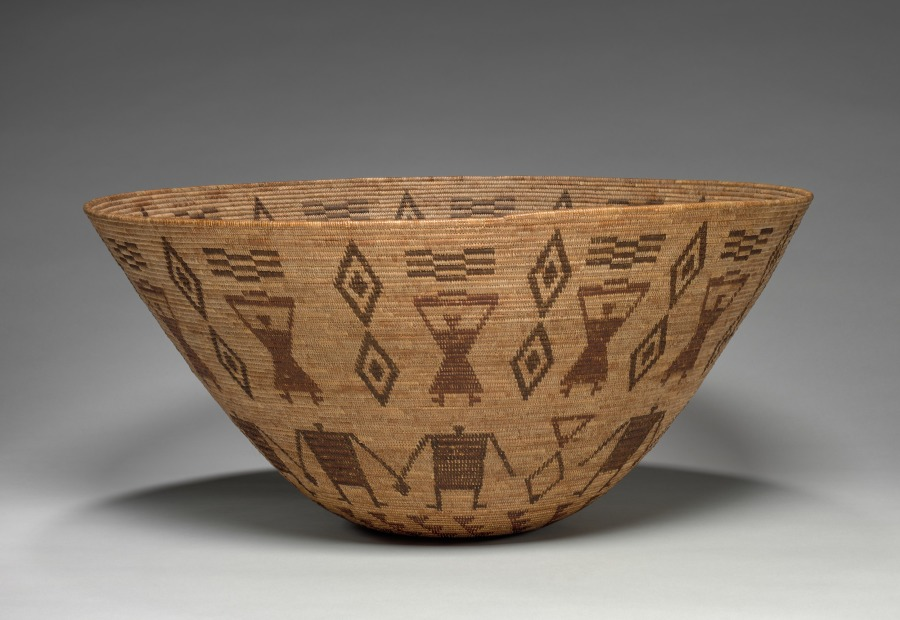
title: Presentation Bowl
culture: Native North America, California, Yokuts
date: 1900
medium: redbud, bracken fern; coiled, grass foundation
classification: Basketry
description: This fine bowl was created by a weaver of the Yokuts, who lived in California’s San Joaquin Valley to the west of Koso (Panamint) Shoshone territory. Shared design motifs indicate contact between the two areas. For instance, the humans who appear to be holding hands in one register on this basket also occur on a small Koso (Panamint) Shosone basket in the collection.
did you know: This fine bowl was created by a weaver of the Yokuts, who lived in California’s San Joaquin Valley.